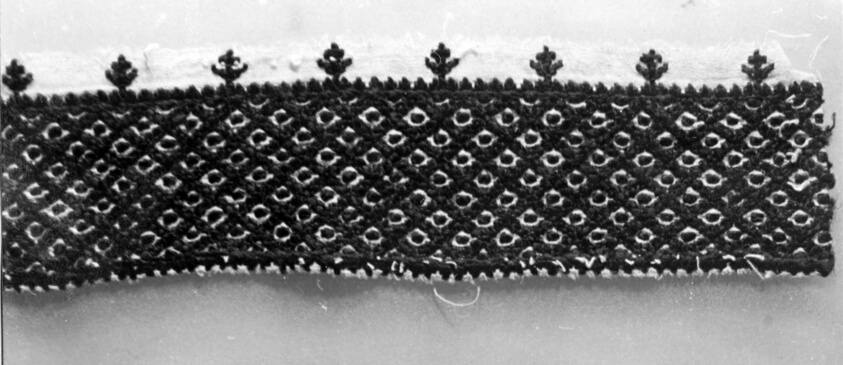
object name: Textile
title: Fragment (Border)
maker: Morocco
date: 19th century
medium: geometric design in blue silk on white linen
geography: Morocco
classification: textile; needlework (visual works); weaving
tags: morocco